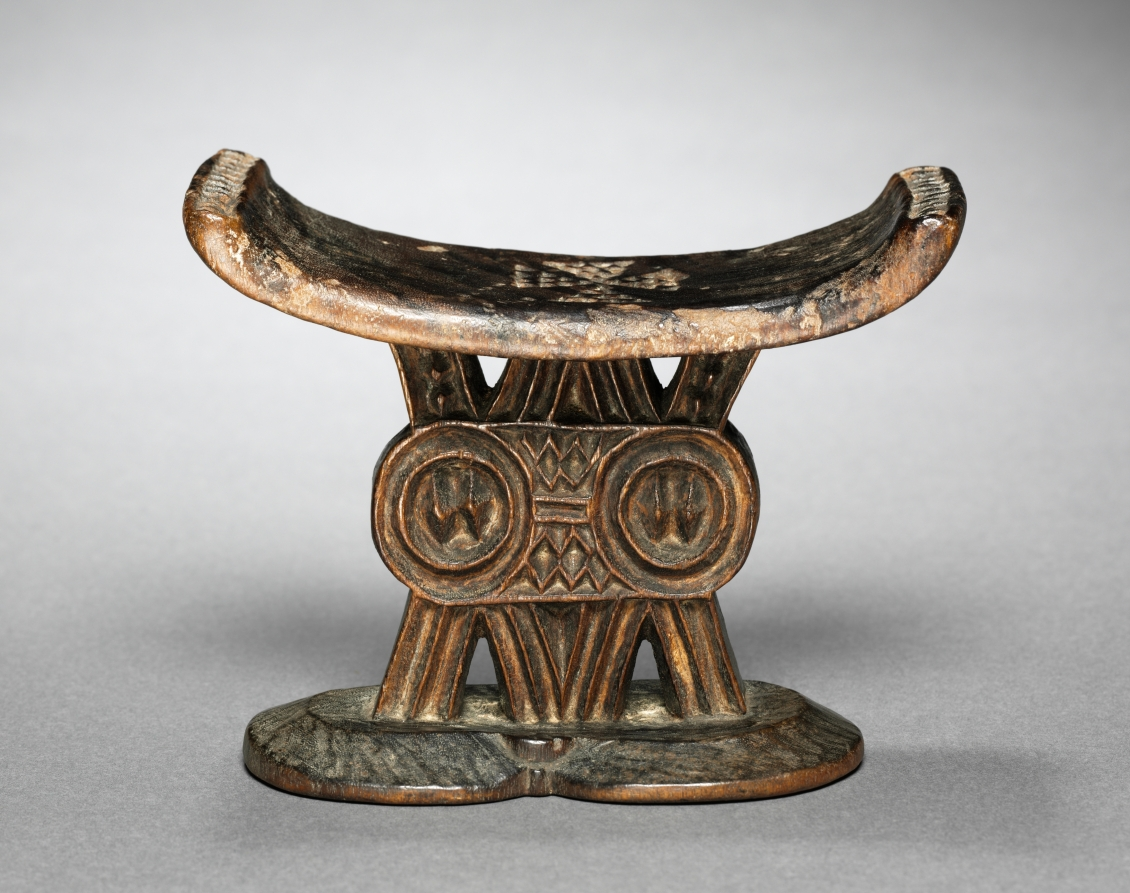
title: Headrest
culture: Africa, Southern Africa, Mozambique, Shona-style maker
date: 1900s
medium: Wood and colorant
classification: Furniture and woodwork